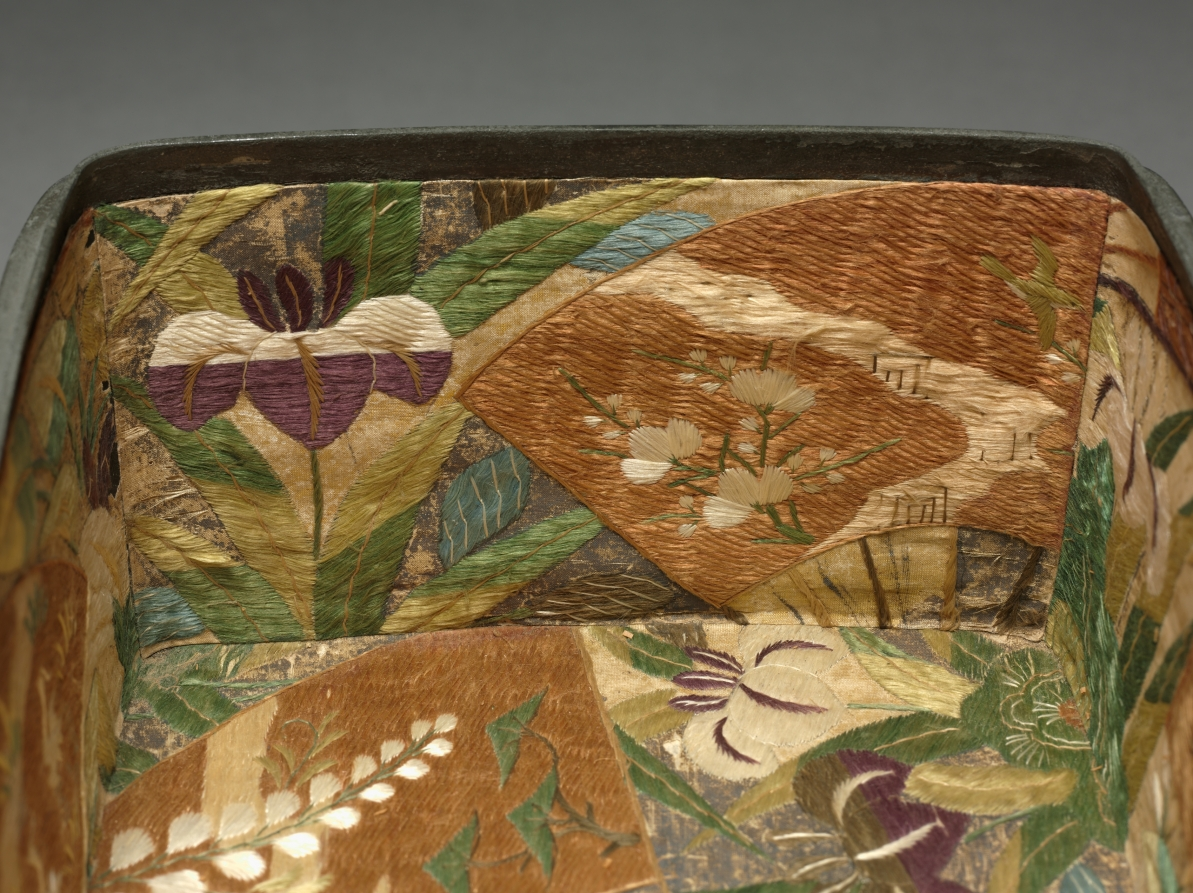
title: Cosmetics Box with Chrysanthemums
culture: Japan, Kamakura period (1185–1333)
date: early 1300s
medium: lacquer on wood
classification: Lacquer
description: In China, the chrysanthemum was historically appreciated for its association with the Double Nine Festival and the reclusive life of the poet Tao Yuanming (AD 365-427). In Japan, the 16-petaled chrysanthemum came to symbolize the Japanese imperial family after Emperor Gotoba (1180-1239) chose the motif as his personal emblem, having it applied to his sword and everyday utensils. This box proves that the flower also appeared on lacquer wares as early as the Kamakura period.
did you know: In Japanese, this type of small box is called a tebako, literally a hand box, and was typically part of a cosmetics set.